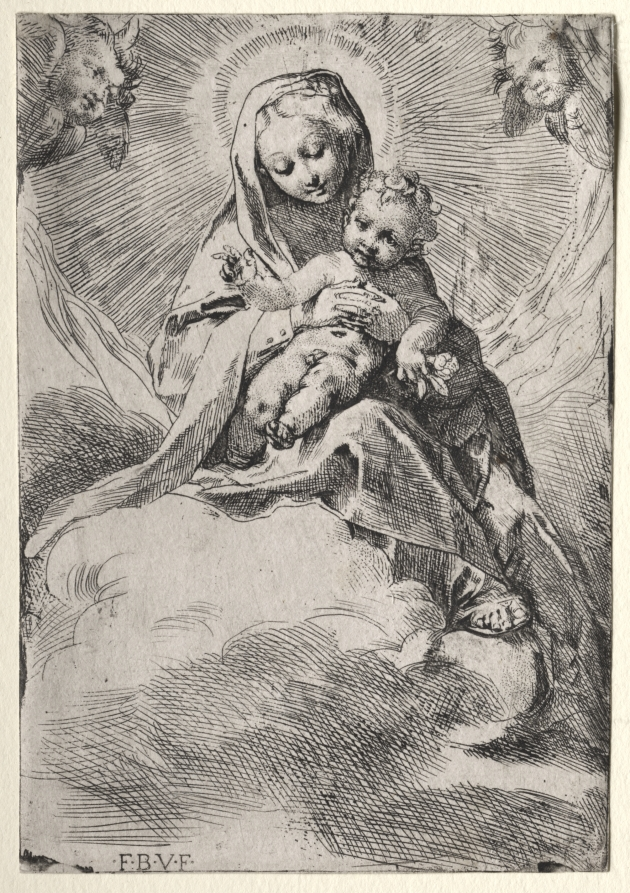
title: Madonna in the Clouds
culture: Italy, 16th century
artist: Federico Barocci (Italian, 1528–1612)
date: c. 1581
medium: etching and engraving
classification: Print